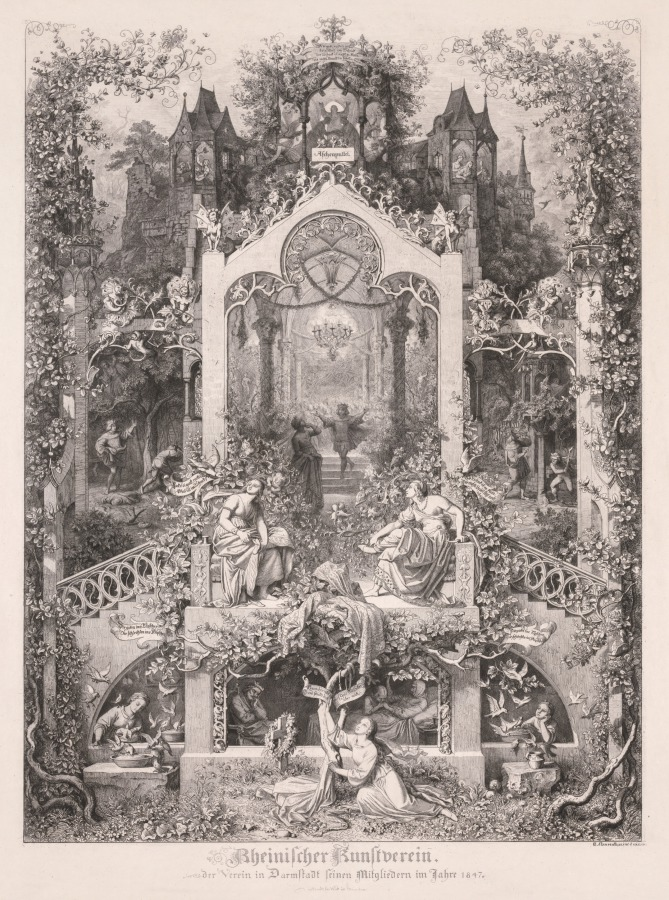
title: Cinderella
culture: Germany, 19th century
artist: Eugen Napoleon Neureuther (German, 1806–1862)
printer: Wendelin Wick (German, active 1842–1853)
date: 1847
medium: etching on steel on wove paper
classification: Print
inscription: In plate: “Rheinischer Kunstverein der Verein in Darmstadt seinen Mitgliedern im Jahre 1847”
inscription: below image; “E. Neureuther inv. et exc. 1847”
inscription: below image right; “gedrukt bei Wick im München” below legend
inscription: Inscribed in graphite, verso: “K3217 / RNPL/VQRT”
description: The fairy tale Cinderella tells of a neglected servant girl who, aided by a fairy godmother, attends a ball and falls in love with a prince. The prince finds his true love by fitting a glass slipper on her foot. Eugen Neureuther made this elaborate etching depicting several scenes from the story during a revival of interest in folk tales in Germany in the early 19th century.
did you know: The fairy tale Cinderella was a German folk tale that became popular in the 19th century in Germany, well before Walt Disney!